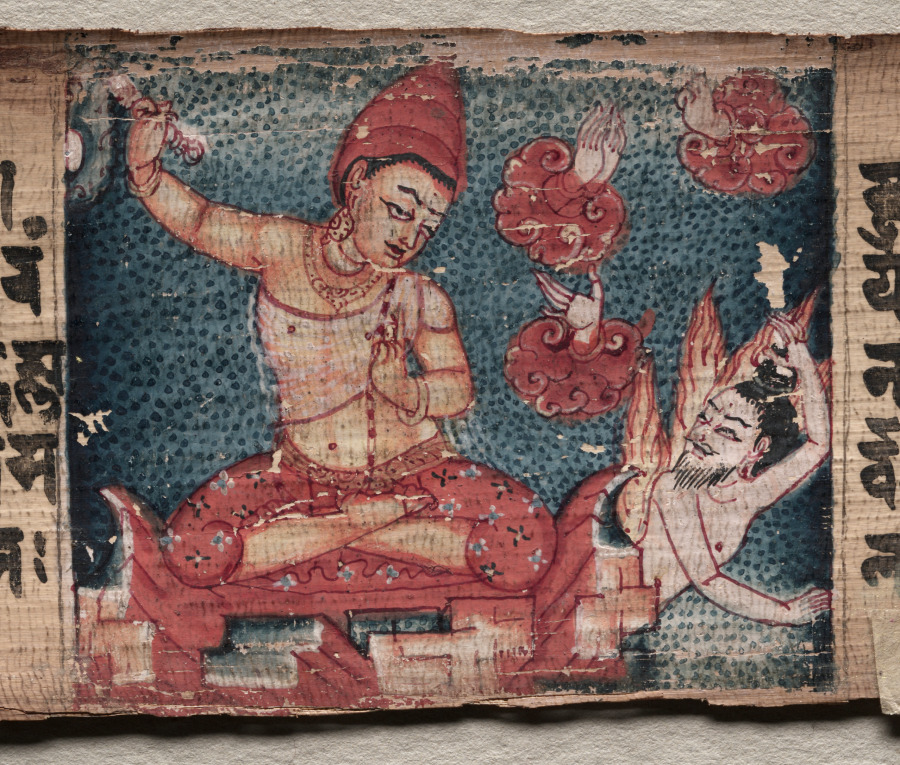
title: Bodhisattva Samantabhadra purifies the path to enlightenment, with Manjushri, folio 348 (verso) from a Gandavyuha-sutra (Scripture of the Supreme Array)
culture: Nepal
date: 1000–1100s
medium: gum tempera and ink on palm leaf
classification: Painting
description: The painting in the center shows a righteous bodhisattva tossing aside a blue-skinned heretic, while an impious blue-clad monk sits behind them, the next to be overpowered by the righteous one. In the painting on the left, the Bodhisattva of Wisdom, Manjushri, brandishes his sword, and at the far right, a Buddhist priest (Vajracharya) sets fire to a Hindu sage in a rocky landscape.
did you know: Blue-clad monks were said to visit prostitutes, drink liquor, and practice extreme tantric rituals.